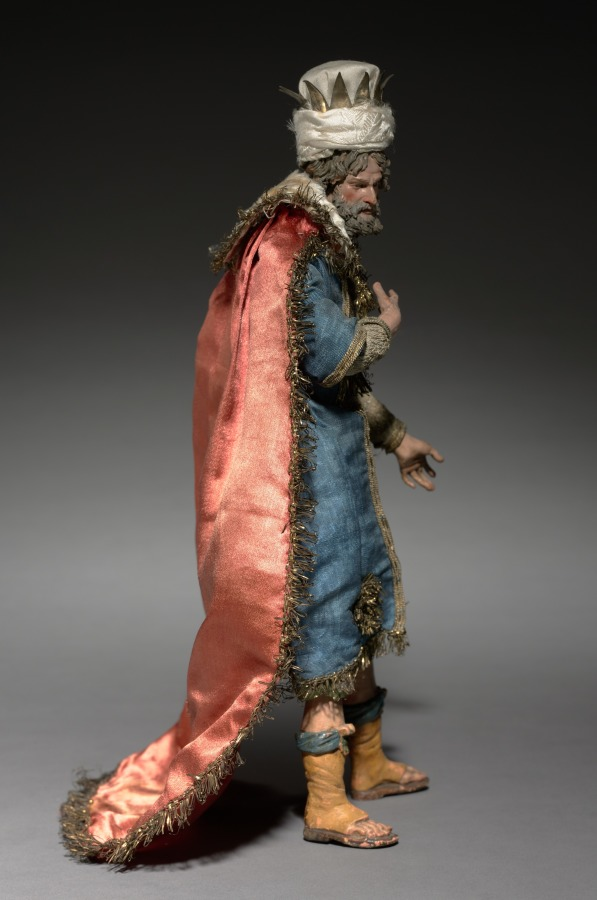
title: Figure from a Crèche: Magus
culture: Italy, Naples, late 18th-early 19th century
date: 1780–1830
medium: painted wood and terracotta with various textiles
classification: Sculpture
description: The practice of creating scenes of the Nativity for the home dates from the early 1700s in Italy, where people began to set up doll-like figures of about a foot or less in height. The custom was particularly popular in Naples around 1800, where crèche scenes (crèche means cradle, or crib) included many figures, whose heads and hands of painted terracotta, stuffed cloth bodies, and clothing adapted from contemporary local costumes gave them an amazingly realistic character. Representations of the birth of Jesus can be traced to the first few centuries of Christianity. Both living creatures and sculptural depictions of them were used from early times. By the late middle ages it was customary to create life-size figures of wood or stone, naturalistically painted, to represent the characters who participated in the events of Jesus's early life. These sculptures were then arranged in scenes illustrating one or both of the most important of these events, the Adoration of the Shepherds and the Adoration of the Magi-the three kings from the East who came to pay homage to the Christ child. Used in churches, these large figures were especially popular in Italy, Central Europe, Spain, and Portugal. This Object in Focus presentation was organized by Henry Hawley, Curator of Renaissance and Later Decorative Arts and Sculpture.